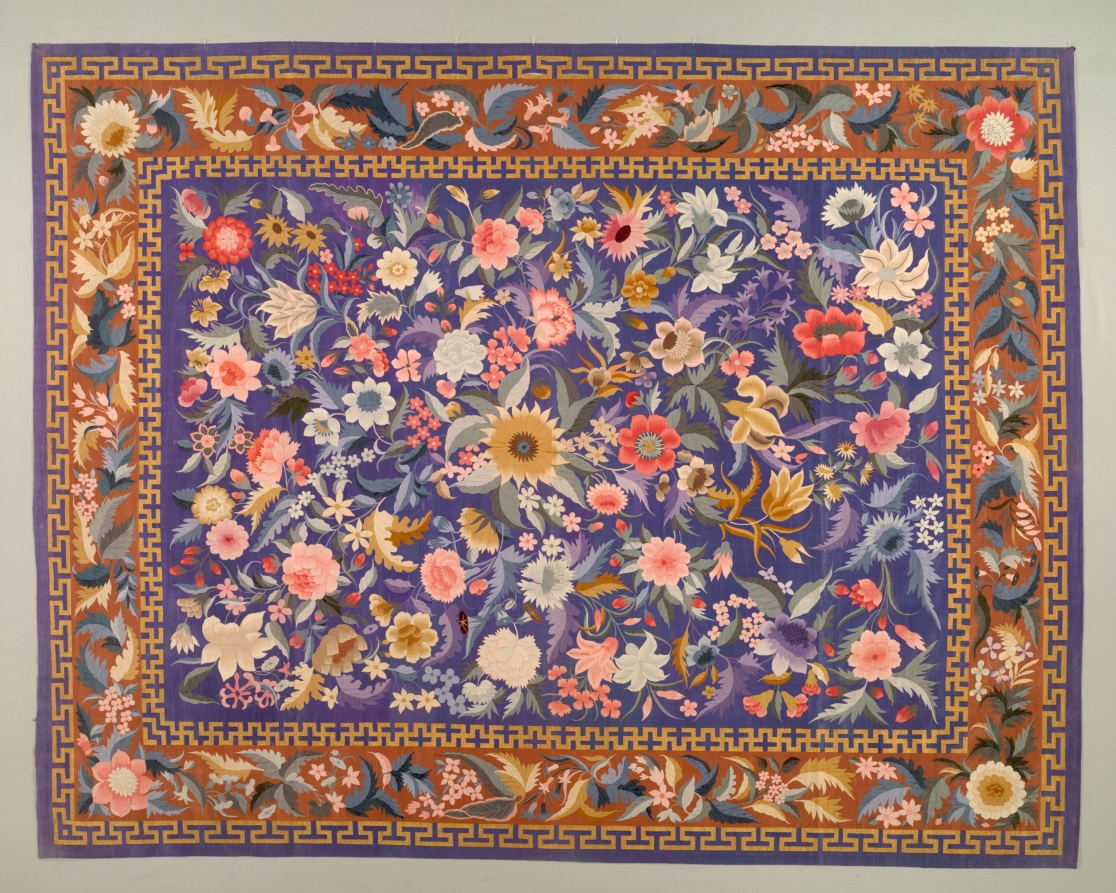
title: Bedcover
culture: China, Qing dynasty (1644-1911)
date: 1800s–1900s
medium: Silk and gold thread; tapestry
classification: Textile